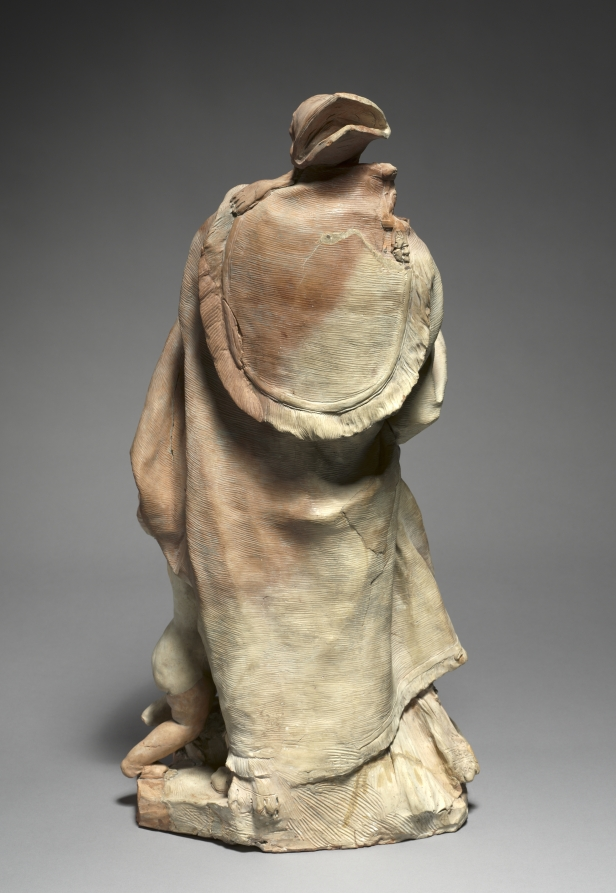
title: Study for The Blessed Alessandro Sauli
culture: France, made in Genoa, 17th century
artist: Pierre Puget (French, 1620–1694)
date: 1663–1668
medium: terracotta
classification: Sculpture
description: A famous preacher from an aristocratic family in Genoa, Sauli (1534-1591) spearheaded important Catholic reforms, including popular missions and restructuring the church to reach a broader spectrum of worshippers. This sculpture is a model for a large statue commissioned by the Sauli family for a Genoese church. Although the open book speaks to Sauli’s work as a reformer, his twisting body and facial expression indicate utter absorption in a deeply personal vision.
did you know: Terracotta models, like this study for a sculpture, are also known as bozzetti or modelli.